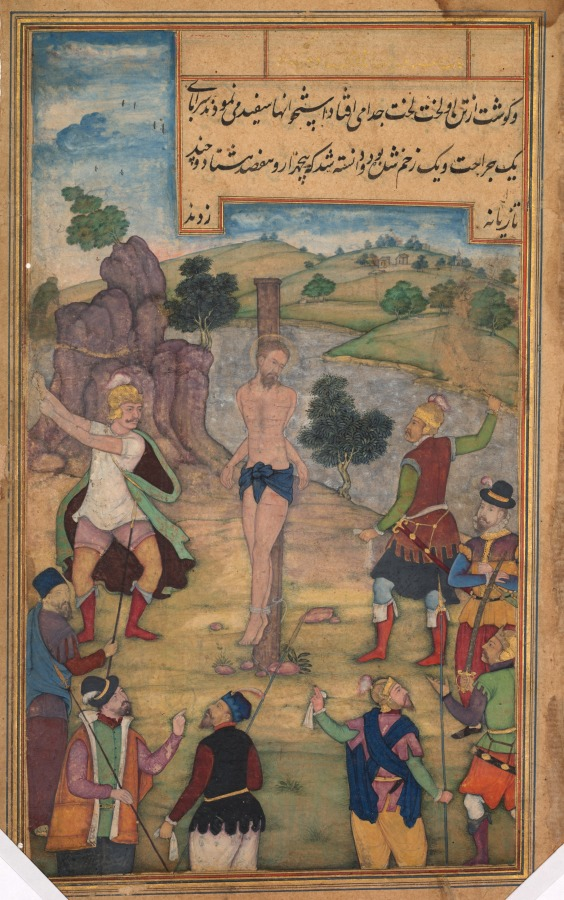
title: The Flagellation (folio 182 recto), from a Mirror of Holiness (Mir’at al-quds) of Father Jerome Xavier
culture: Mughal India, Allahabad, made for Prince Salim (1569–1627)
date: 1602–4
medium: Gum tempera, ink, color, and gold on paper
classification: Manuscript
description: Two Romans flog Jesus, who has been bound to a stake at the center of the circular composition made up of soldiers and the hilly horizon. His subtly articulated expression conveys both pain and compassion, as he endures cuts to his flesh and the bindings around his elbows that secure him so tightly to the post that his feet are elevated off the ground. This is the last illustration in the Cleveland manuscript of the Mirror of Holiness. The Crucifixion was never illustrated, possibly because the patron, Prince Salim, was Muslim. According to the Koran, Jesus did not die on the cross, but was absorbed into heaven by Allah.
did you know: A halo encircles Jesus’s head, and his hair and beard are highlighted with gold.